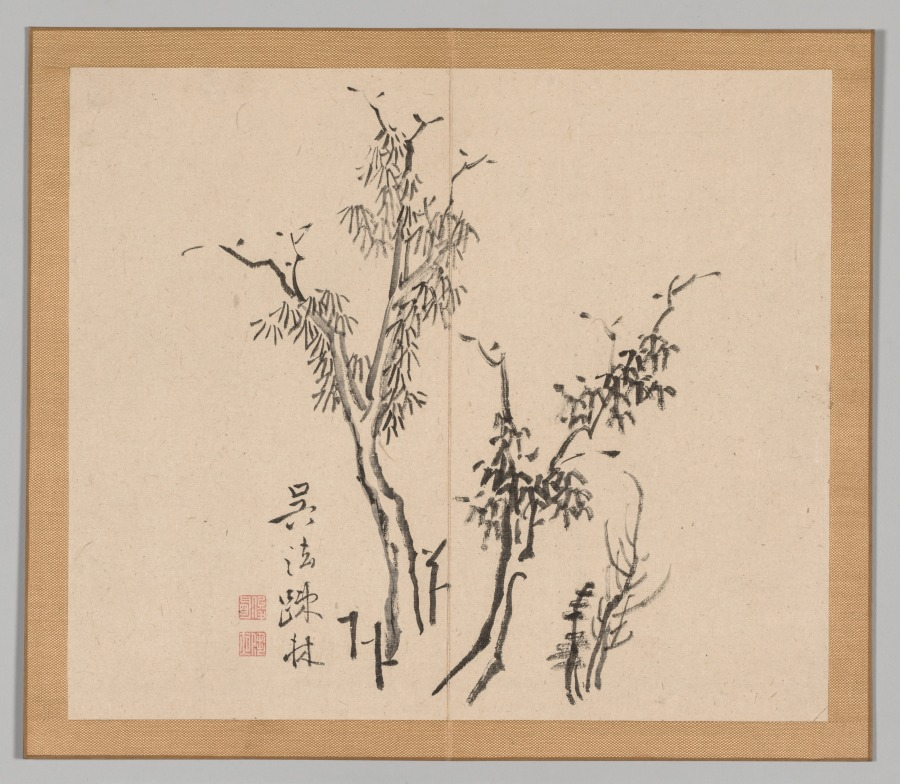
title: Reverberations of Taiga, Volume 1 (leaf 5)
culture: Japan, Edo period (1615–1868)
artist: Aoki Shukuya (Japanese, d. 1802)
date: mid- to late 1700s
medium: double-leaf from a pair of albums; ink and light color on paper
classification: Portfolio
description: Traditionally, young painters in Japan began their studies with an established master-painter. The master's compositions invariably became models that the apprentice copied to learn various ink and brush techniques. Shukuya was a pupil of the famous Kyoto artist Ikeno Taiga, whose style is reflected in these sketches of rocks, trees, and mountains.